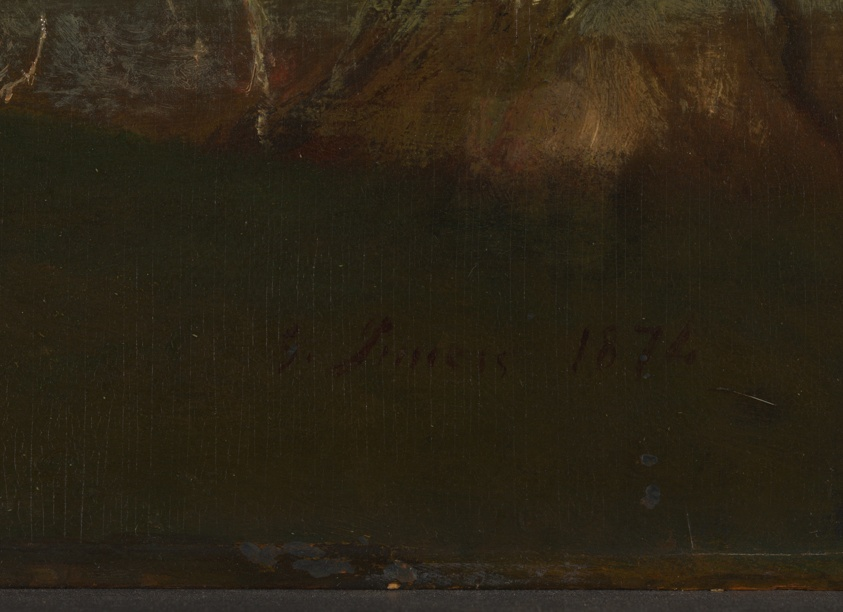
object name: Painting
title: Twilight in Italy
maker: George Inness (American, 1825–1894)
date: 1874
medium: Oil on panel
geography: United States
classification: painting; american arts